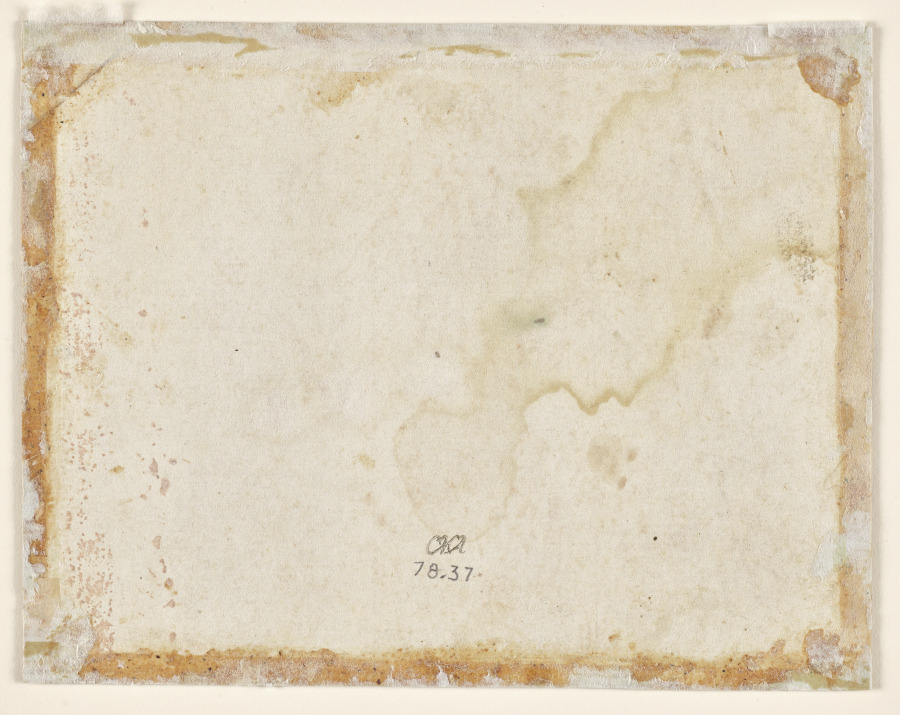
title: Studies of a Seated Female, Child's Head, and Three Studies of a Baby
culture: Italy, 16th century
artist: Raphael (Italian, 1483–1520)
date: c. 1507–8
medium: metalpoint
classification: Drawing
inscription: lower right, in brown ink: 74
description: This drawing is from Raphael’s "pink sketchbook," comprised of ten sheets of roughly equal size that each portray variations of a mother and child. Today, six of the drawings at the Palais des Beaux-Arts, Lille; two are at the British Museum; one is in a private collection; and one is in Cleveland. The small format of the sheets would have enabled the artist to carry the notebook as he traveled from Florence to Rome in 1508. Raphael used metalpoint, a technique popular in 15th- and early 16th-century Italy on a pink prepared surface. The pose of the infant's head in the drawing was based on that of the Christ child in Leonardo da Vinci's Benois Madonna, then in a private collection in Florence, with changes—such as the uplifted eyes and open mouth—made by Raphael. The curving back of the female nude is echoed in the roundness of the child's head. The three sketches of a reclining infant at the bottom of the sheet are freely handled and improvisational, relaying the child's squirming, continuous movement with repeated contour lines.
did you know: This sheet was probably once part of a sketchbook carried by the artist Raphael on a 1508 journey between Florence and Rome.